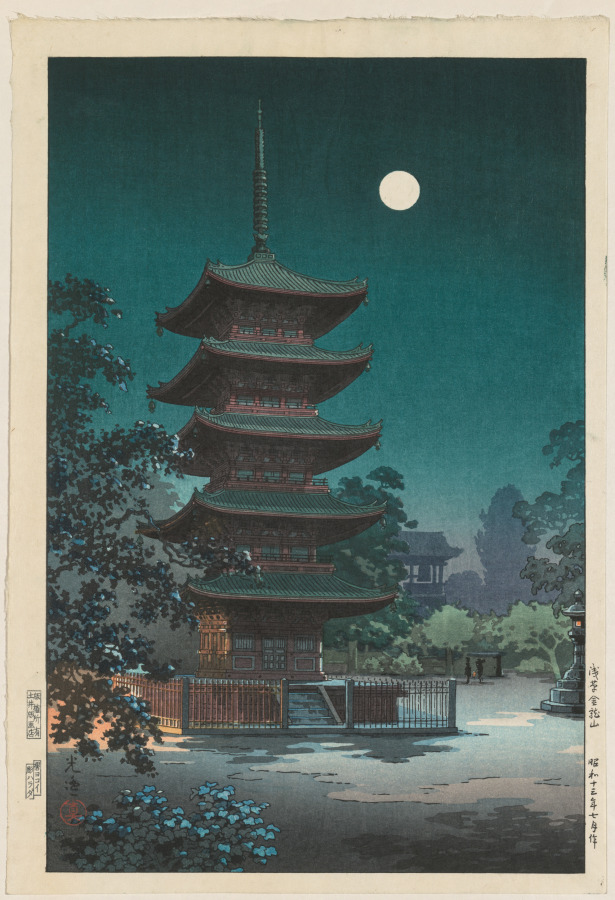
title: Sketches of Famous Places in Japan: Asakusa Kinryūzan Temple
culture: Japan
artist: Tsuchiya Kōitsu (Japanese, 1870–1949)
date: 1938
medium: color woodcut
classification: Print